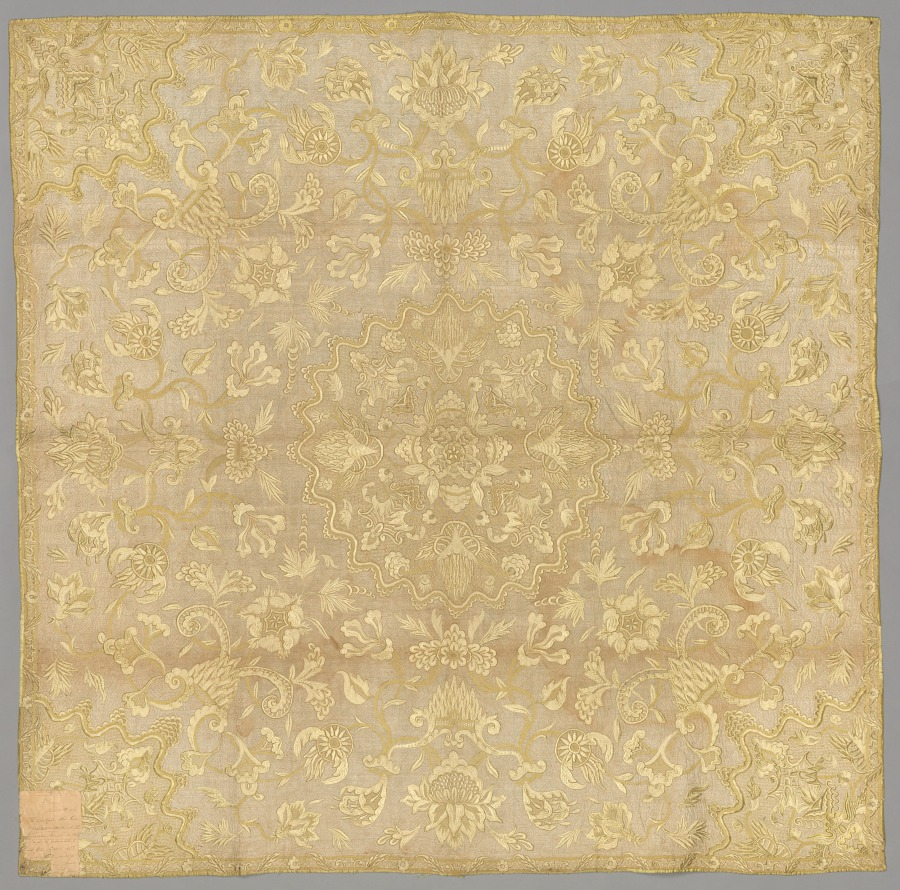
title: Coverlet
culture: Ireland, early 19th century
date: early 1800s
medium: embroidery; silk thread on linen ground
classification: Embroidery